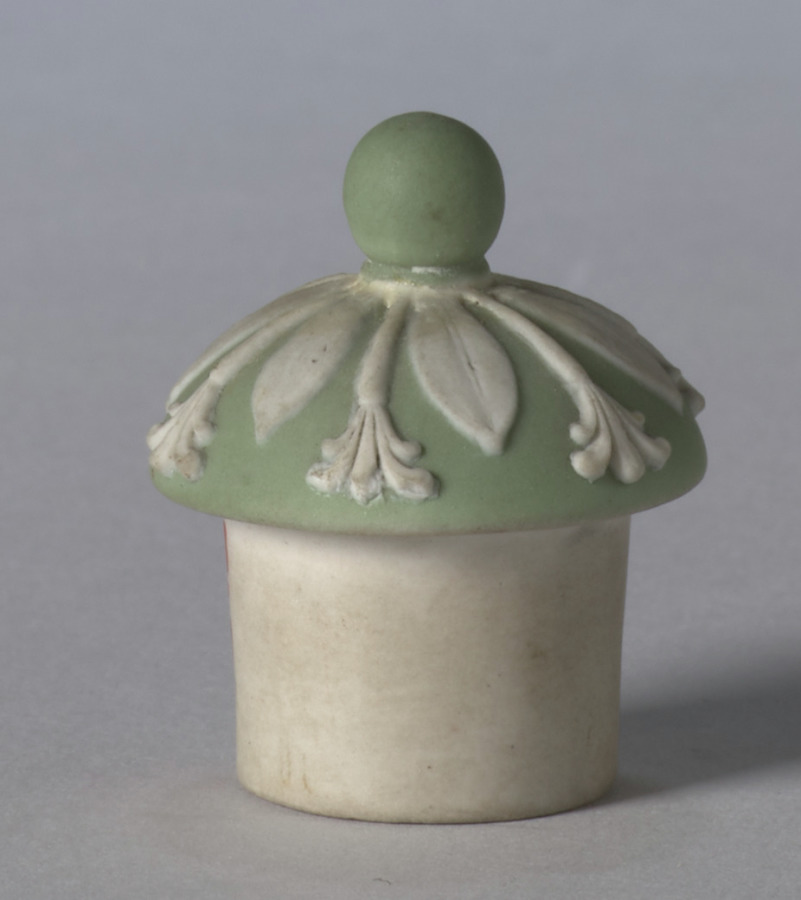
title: Cover for an Urn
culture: England, Staffordshire, late 18th-early 19th Century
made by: Wedgwood Factory (British)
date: c. 1800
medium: jasper ware with relief decoration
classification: Ceramic